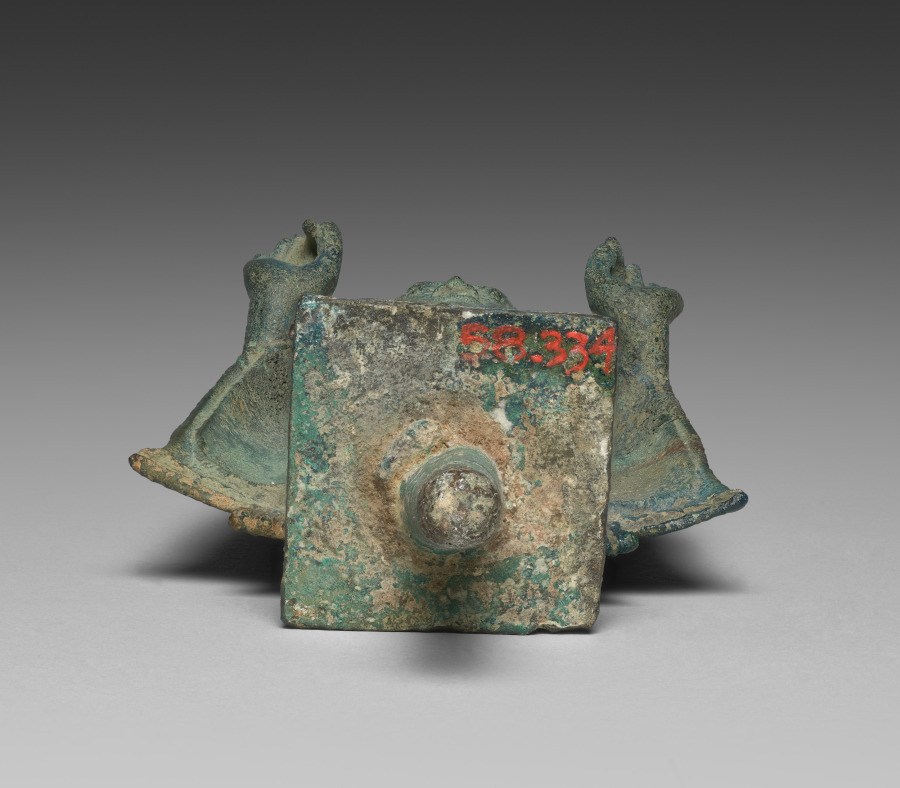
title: Buddha with Hands in Gesture of Teaching, Vitarka Mudra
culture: Thailand, Mon-Dvaravati period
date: 600s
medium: bronze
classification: Sculpture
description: Made during the early phase of Buddhist art production in mainland Southeast Asia, this Buddha wears a plain robe that indicates the artist's awareness of images made at the workshops of Sarnath, on the Ganges River in India. The hem of the lower garment, worn under the monk's robe, elegantly crosses the ankles, and the subtle line at the waist shows where it is secured.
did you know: Bronze sculptures in Thailand were made by sculpting clay around an iron armature; the clay core remains inside.